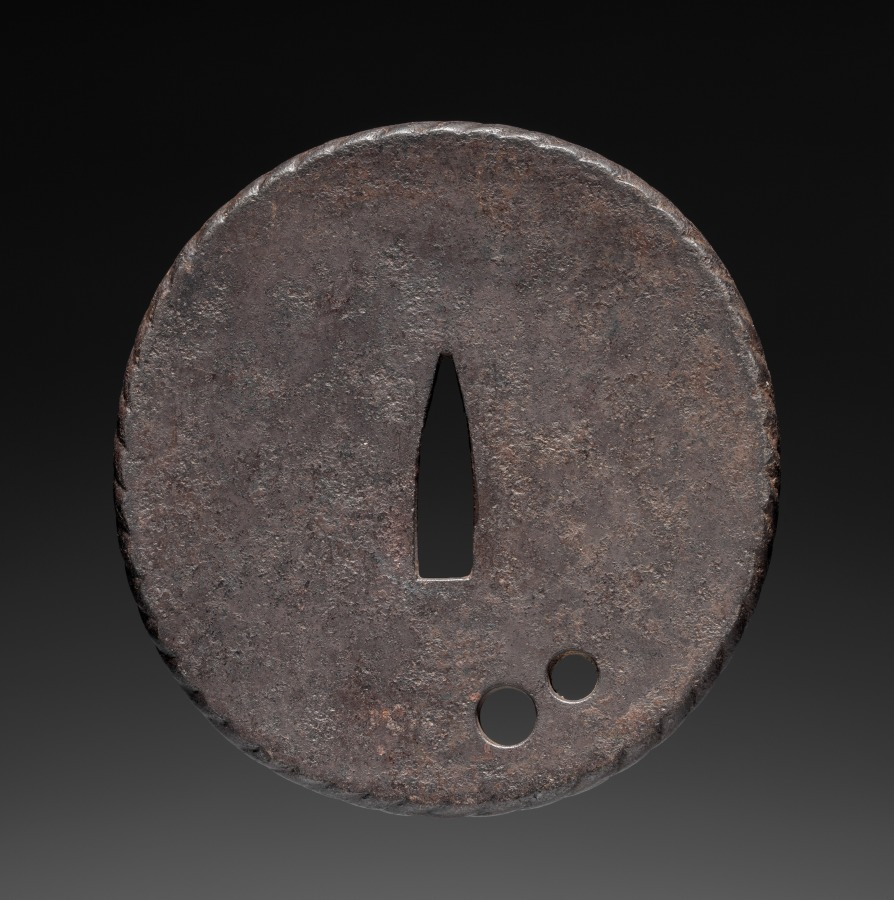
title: Sword Guard (Tsuba)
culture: Japan, possibly Edo period (1615-1868)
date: c. 1615–1868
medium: iron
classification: Arms and Armor